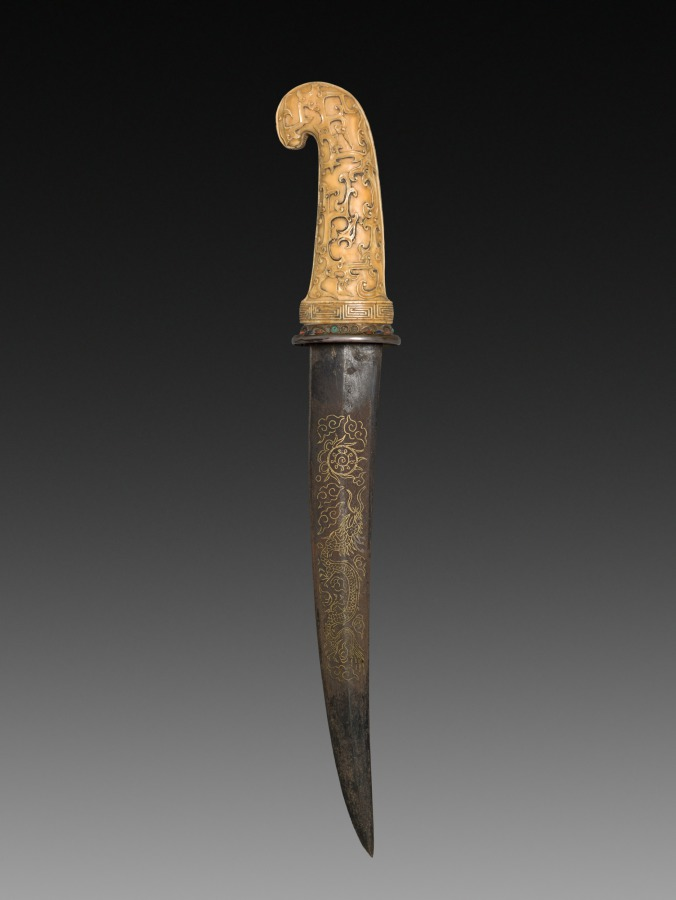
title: Small Sword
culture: China, Qing dynasty (1644-1911)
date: 1800–1911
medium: metal blade, ivory handle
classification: Arms and Armor